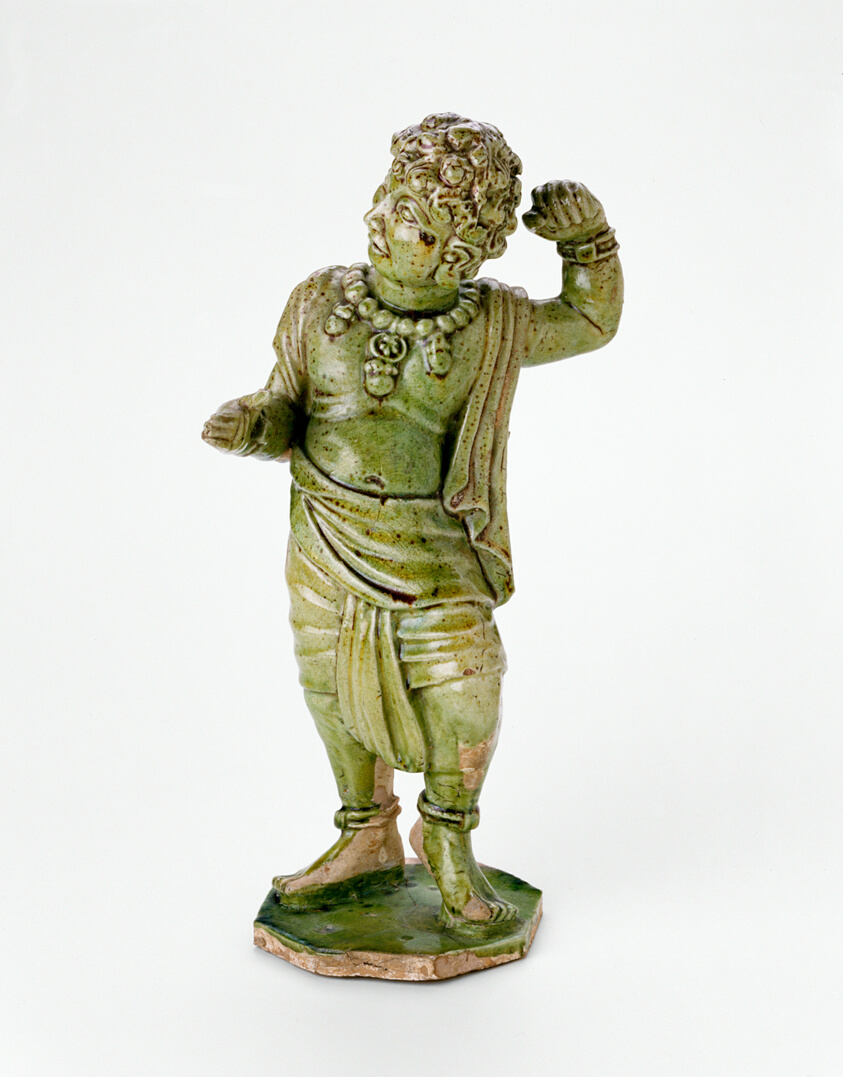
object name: Sculpture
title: Curly-Haired Youth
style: Chinese (culture or style)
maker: China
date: Tang dynasty (618–907), first half of 8th century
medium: Earthenware with green lead glaze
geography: China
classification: earthenware; asian art; ceramics; sculpture